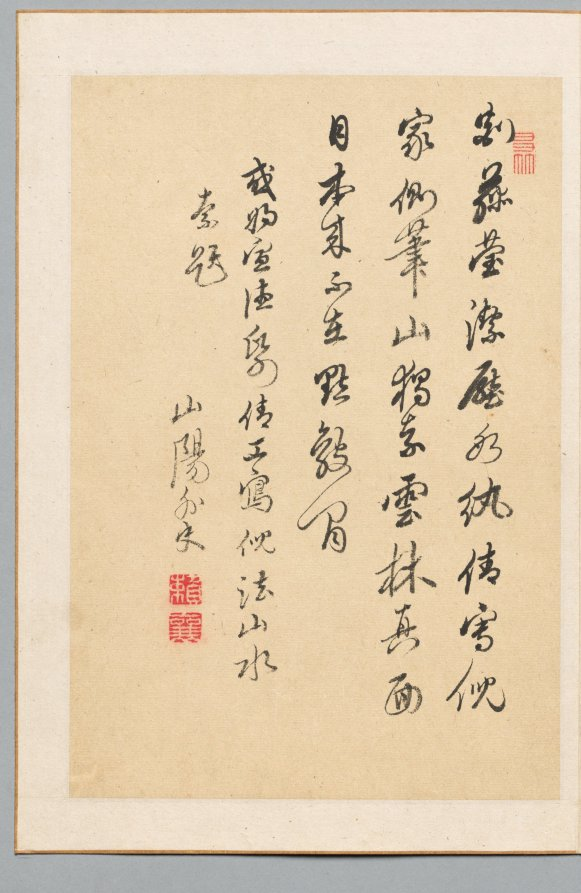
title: Poem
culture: Japan, Edo period (1615–1868)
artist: Rai Sanyō (Japanese, 1780–1832)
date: early 1800s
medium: leaf from a pair of folding albums; ink on paper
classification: Portfolio